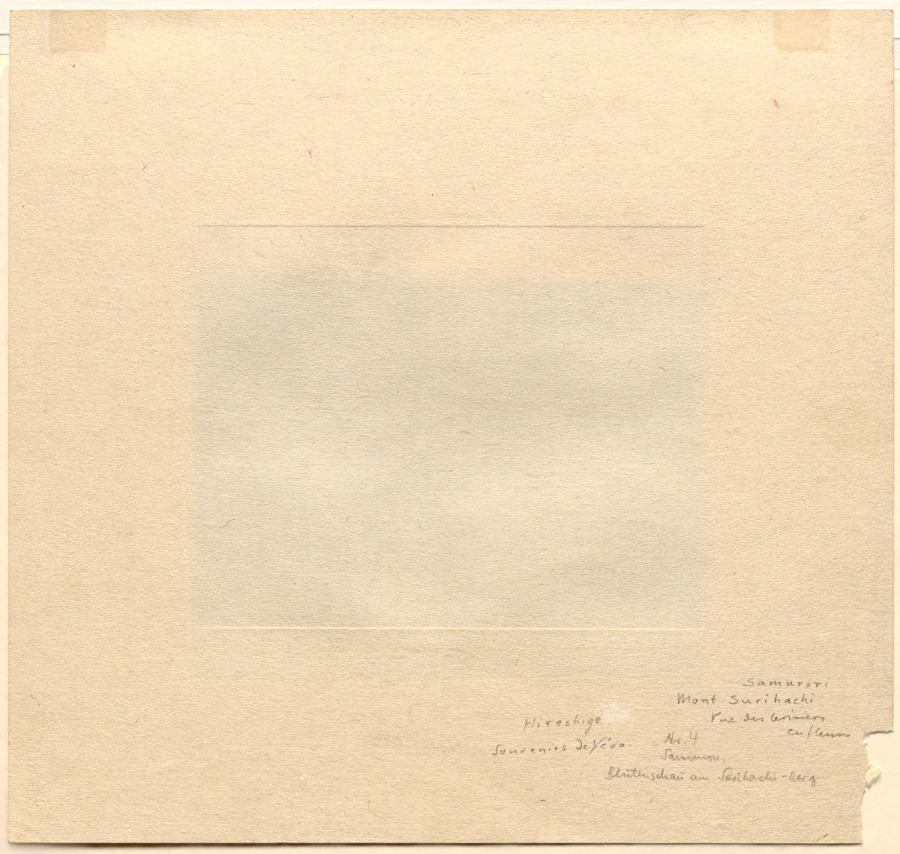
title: Cherry Blossom Viewing at the Temple on Mt. Suribachi after a Design in Volume 5 of Picture Book of the Souvenirs of Edo (Ehon Edo miyage)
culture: Japan, Edo period (1615–1868)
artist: after Utagawa Hiroshige (Japanese, 1797–1858)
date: after 1850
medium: watercolor on paper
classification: Drawing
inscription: Titled in upper right.